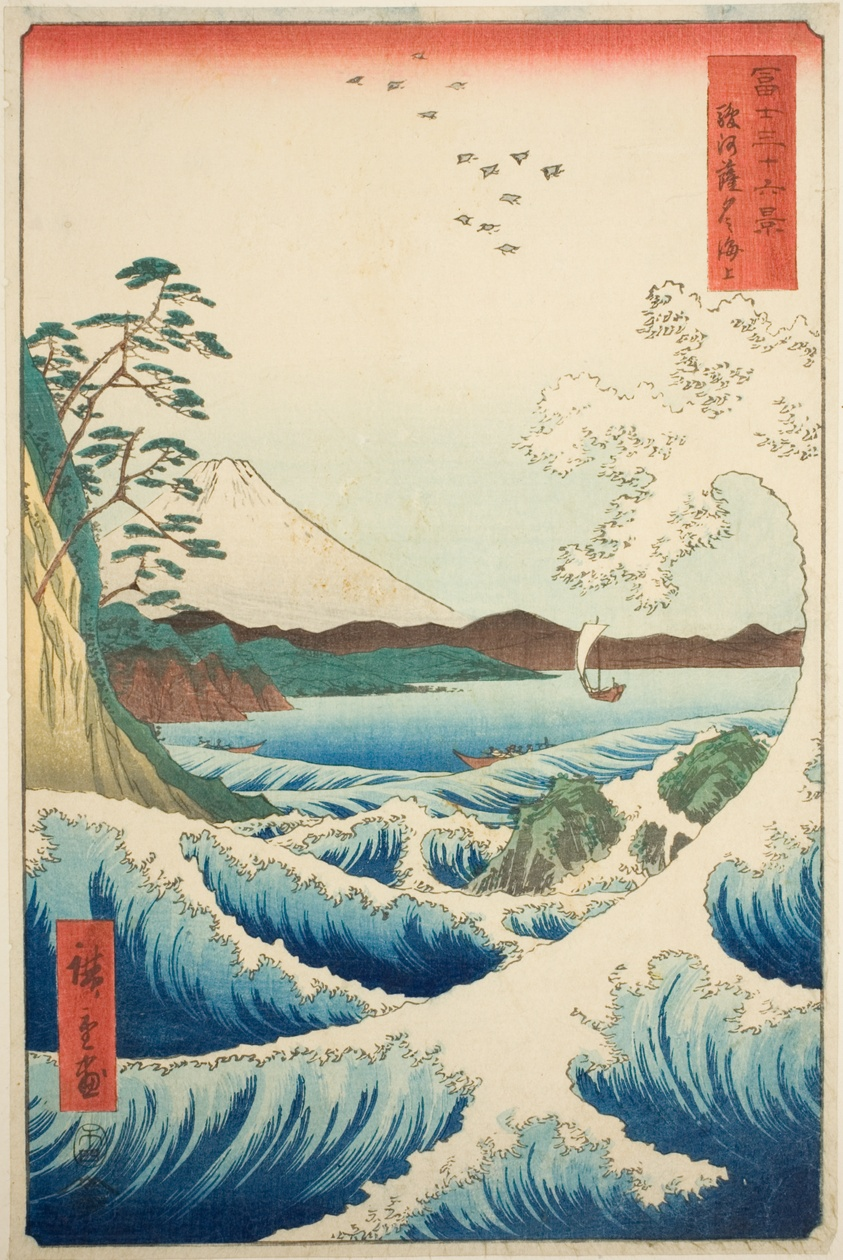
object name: Print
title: The Sea off Satta in Suruga Province (Suruga Satta no kaijo), from the series "Thirty-six Views of Mount Fuji (Fuji sanjurokkei)"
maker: Utagawa Hiroshige 歌川 広重; Japanese, 1797-1858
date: 1858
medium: Color woodblock print; oban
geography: Japan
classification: woodblock print; print; asian art